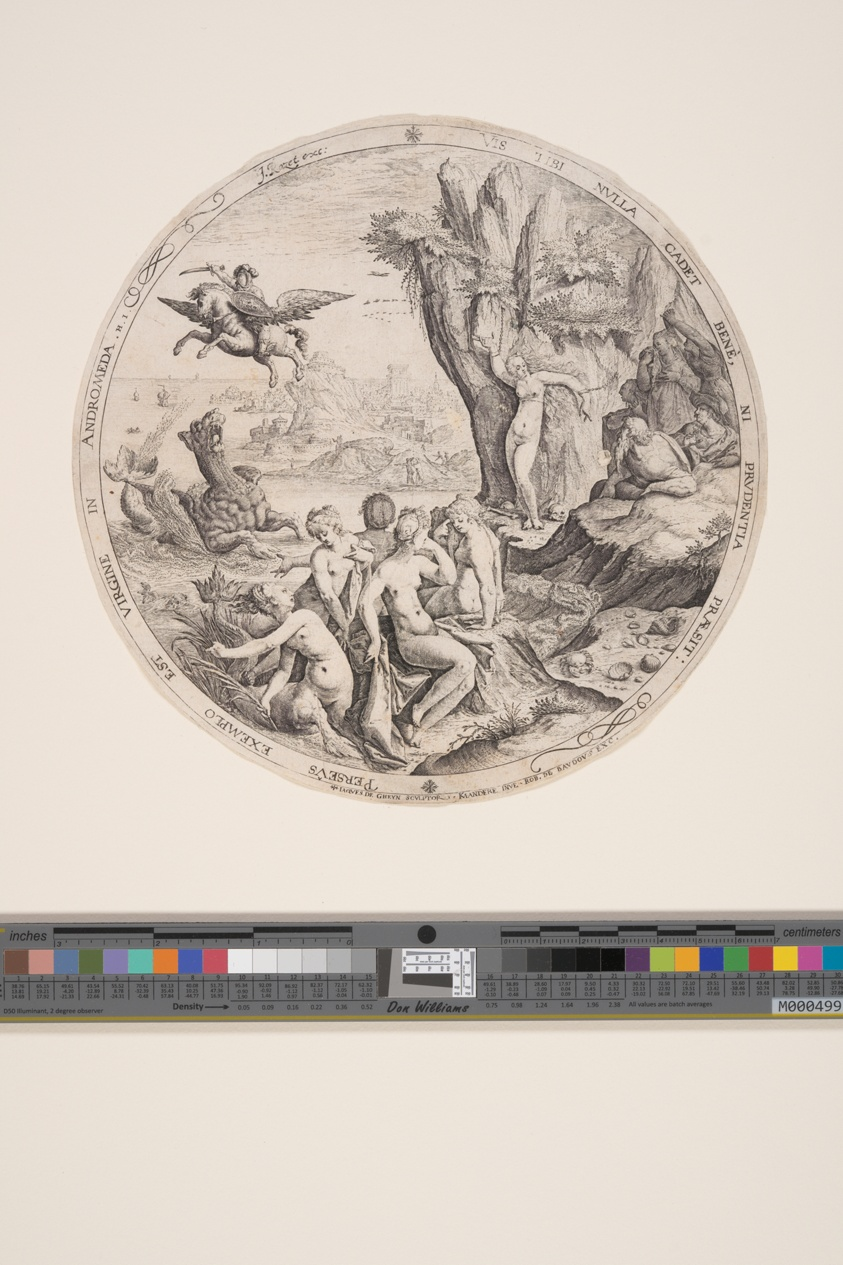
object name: Print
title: Perseus Liberating Andromeda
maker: Jacques de Gheyn II (Dutch, 1565–1629); after Karel van Mander (Dutch, 1548–1606)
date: 1588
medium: Engraving on laid paper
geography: Netherlands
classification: engraving; paper; print; prints and drawing